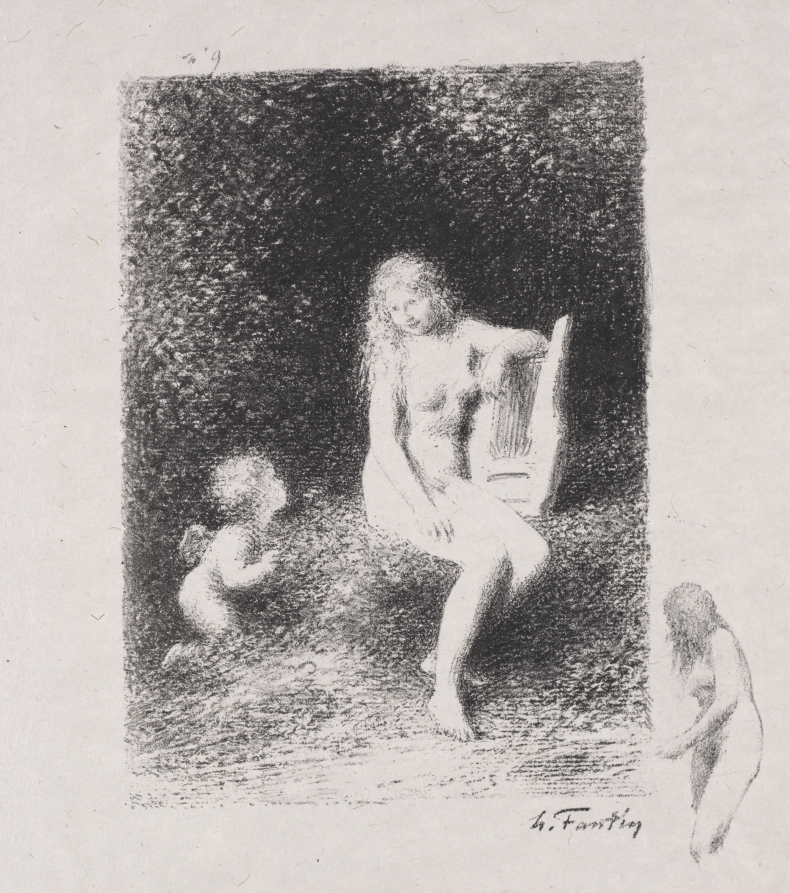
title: XXI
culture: France, 19th century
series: Illustrations for the Poems of André Chénier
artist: Henri Fantin-Latour (French, 1836–1904)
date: c. 1905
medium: lithograph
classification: Print